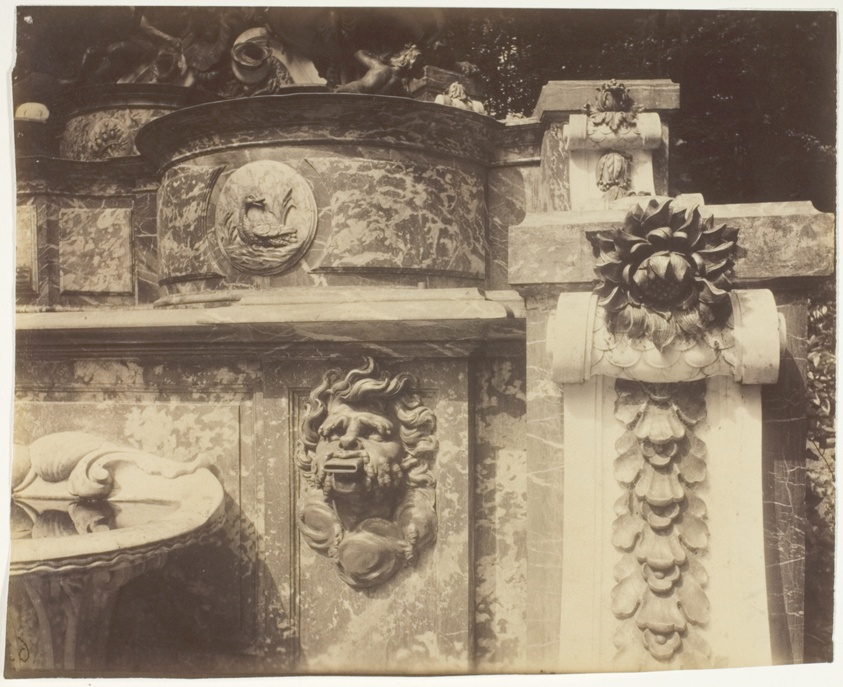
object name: Photograph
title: Versailles, Grand Trianon (Le Buffet)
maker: Jean-Eugène-Auguste Atget (French, 1857–1927)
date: 1905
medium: Albumen print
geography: France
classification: albumen silver print; photographic process; photography; photograph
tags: Collected by Hugh Edwards